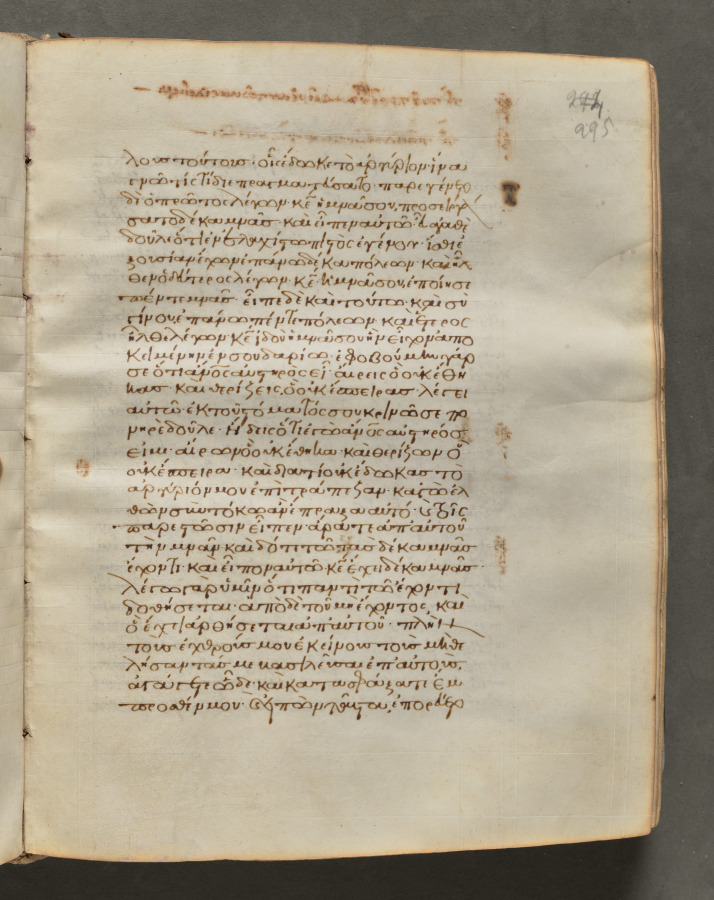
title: Text, folio 295 (recto), from a Gospel Book with Commentaries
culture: Byzantium, Constantinople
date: c. 1000–1100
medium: ink, tempera, and gold on vellum; leather binding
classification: Bound Volume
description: Each of the four gospels in this book opens on a page with brilliantly illuminated borders depicting the author of the text as well as birds—principally peacocks, symbols of the immortality of the soul—and fountains, representing the fountain of life and the salvation of the soul. This volume consists of 428 leaves with texts in Greek. Its level of sophistication suggests that it was probably written and decorated in a monastery in Constantinople.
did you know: Gospel books were carried in procession through Byzantine churches.